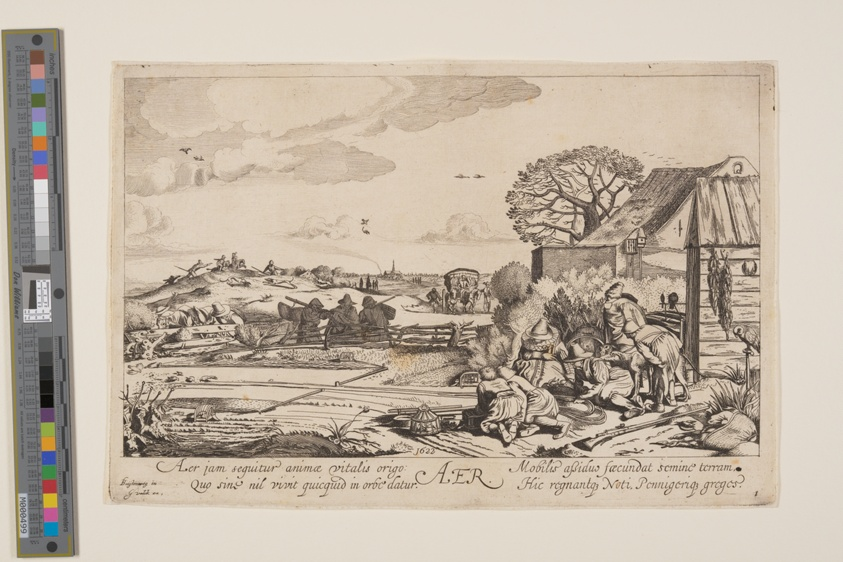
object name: Print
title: Air (with a view of Haarlem), from The Four Elements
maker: Jan van de Velde II (Dutch, c. 1593–1641); after Willem Buytewech (Dutch, 1591/92-1624)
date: 1622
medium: Etching on ivory laid paper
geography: Netherlands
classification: print; paper; prints and drawing; etching